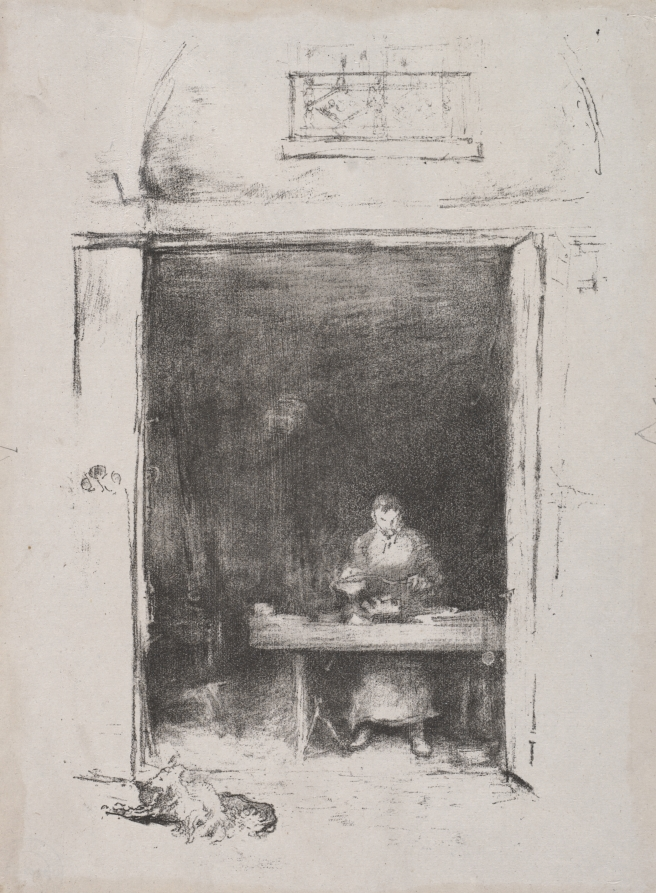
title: The Smith: Passage du Dragon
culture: America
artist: James McNeill Whistler (American, 1834–1903)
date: 1894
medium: lithograph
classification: Print